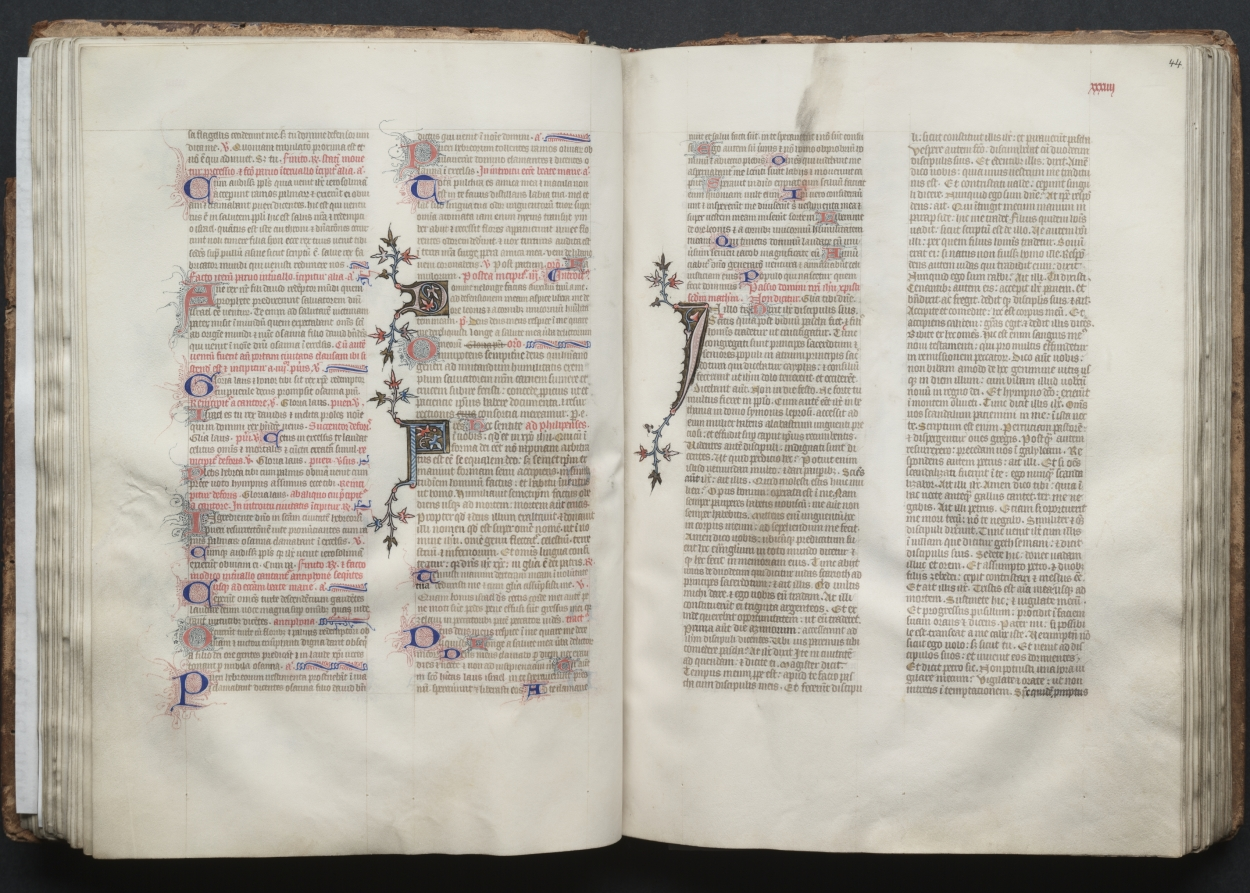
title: The Gotha Missal: Fol. 43v, Text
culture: France, Paris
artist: Master of the Boqueteaux (French)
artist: and Workshop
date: c. 1375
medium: ink, tempera, and gold on vellum; blind-tooled leather binding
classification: Bound Volume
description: The style and quality of this manuscript's decoration is typical of deluxe Parisian books made for aristocratic or royal patrons. Most of the book's decoration appears to be the work of the Master of the Boqueteaux, an artist active at the court of King Charles V (died 1380). His style was apparently shared by a number of book illuminators working in and around Paris. It is very possible that the Gotha Missal belonged to Charles V, but is not provable because the manuscript has no royal portraits and lacks a colophon. Given the book's magnificent decoration, however, it would seem that it was produced for a Valois prince, if not for the king himself. The manuscript receives its name from the German dukes of Gotha, its later owners.